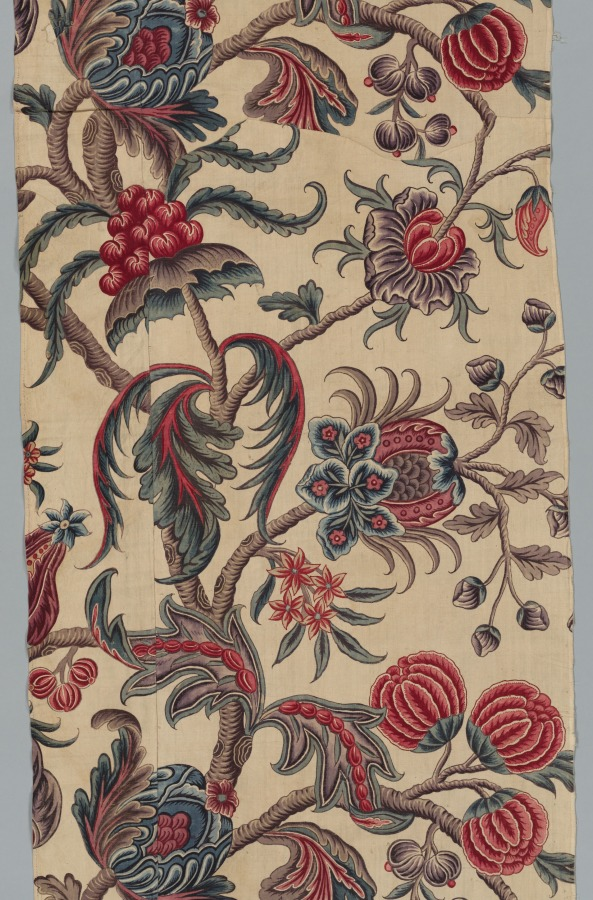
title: Strip of Woodblock Printed Linen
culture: France, late 18th century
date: c. 1785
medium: woodblock print on linen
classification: Textile